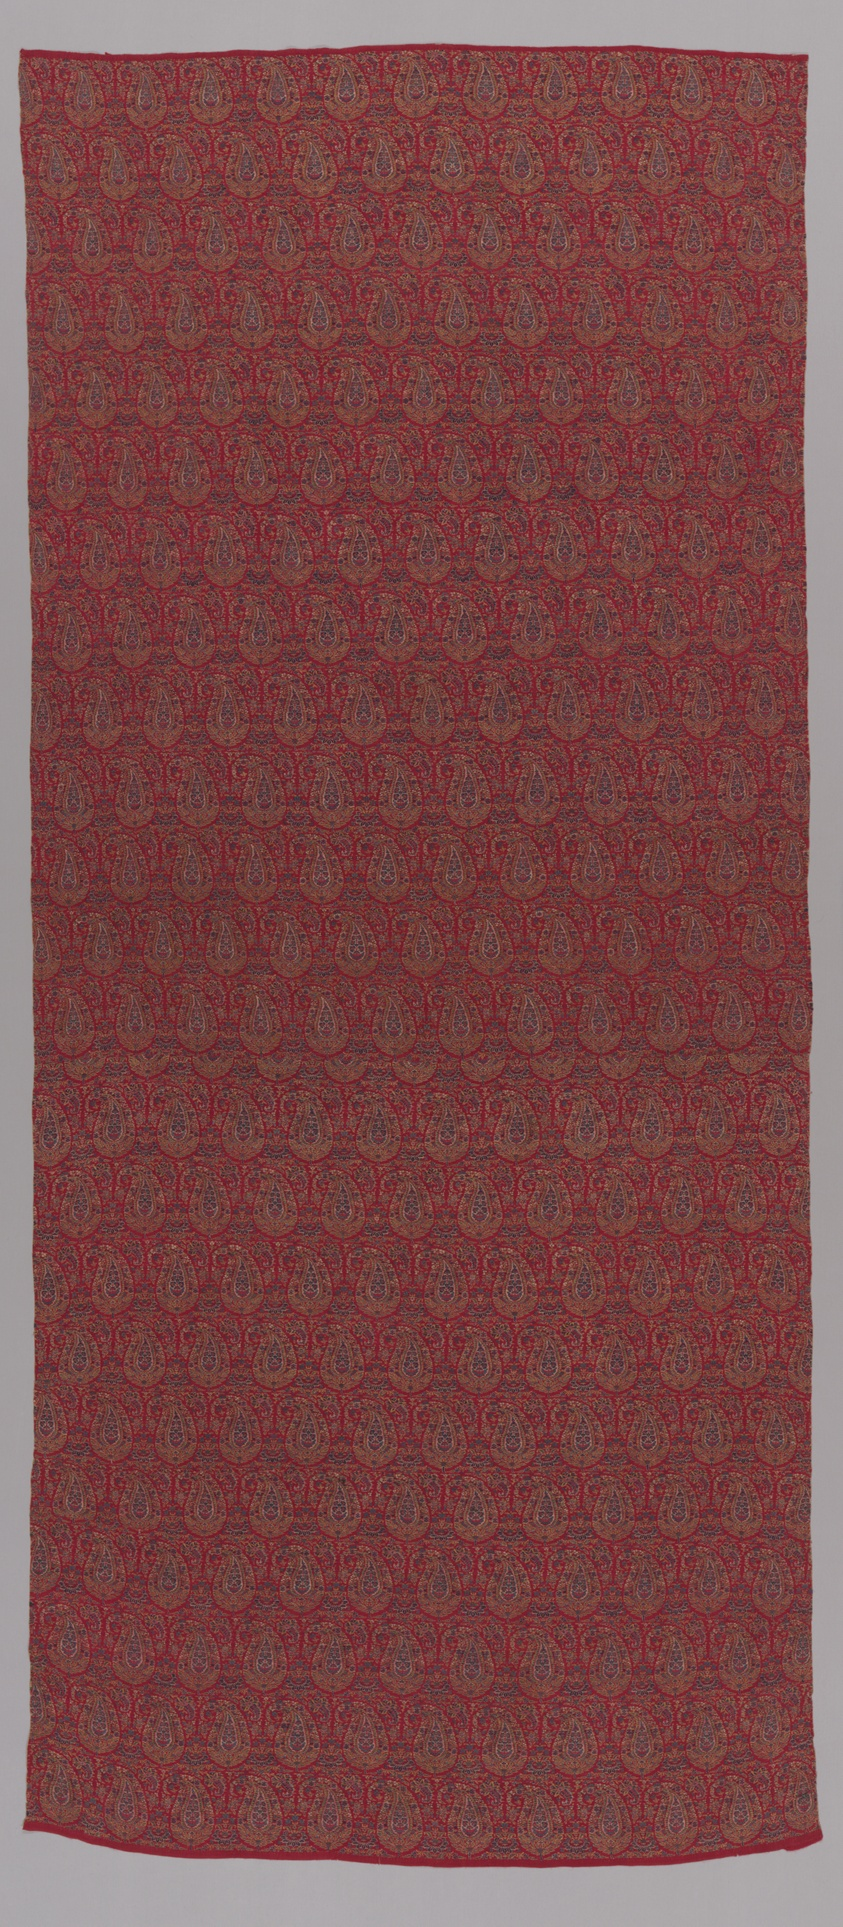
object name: Costume and Accessories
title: Kani Jamawar (Fabric for a Jama Coat or Shawl)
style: 19th century, kashmiri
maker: Probably Kashmir for the Persian market (present-day Iran)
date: 1825–75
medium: Wool, pieced double interlocking 2:2 'S' twill tapestry weave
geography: Kashmir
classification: textile; weaving; costume; garment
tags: paisley, botanical, floral, vines